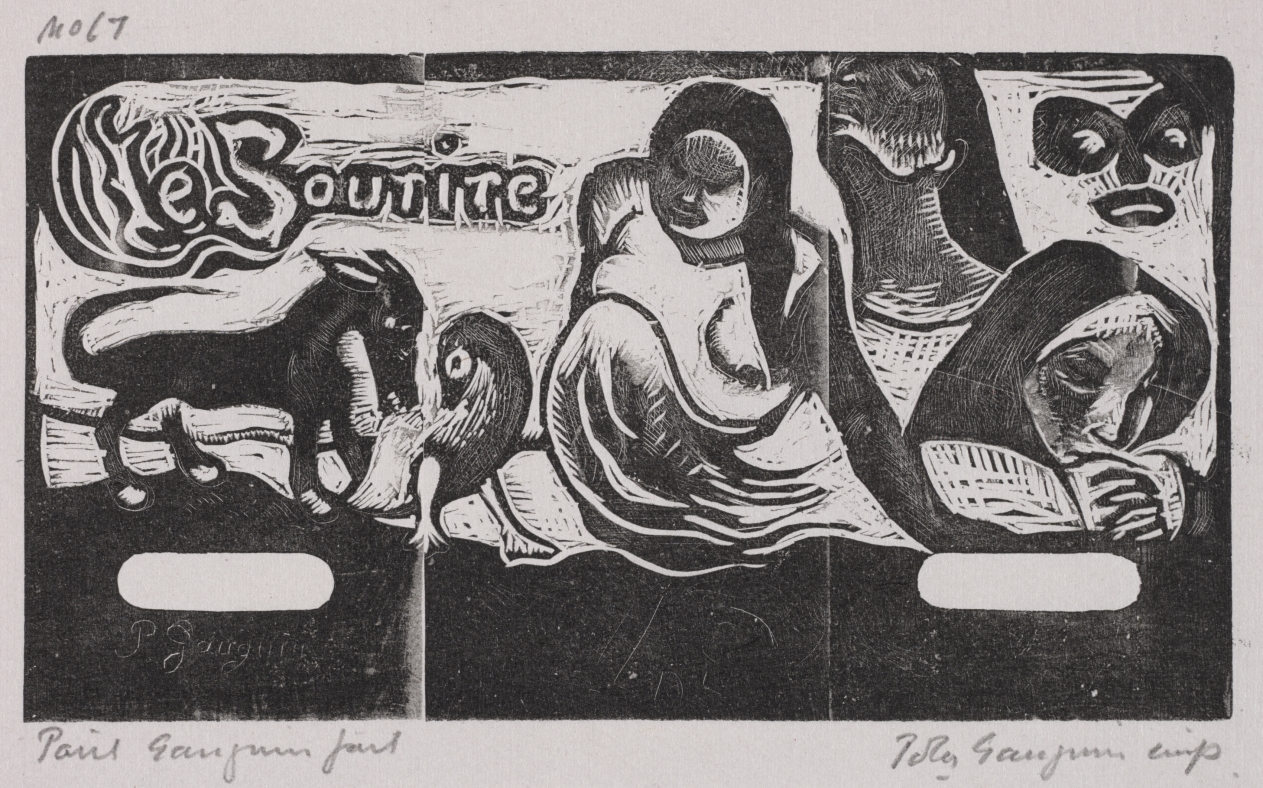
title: Tahitian Series: The Smile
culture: France, 19th century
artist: Paul Gauguin (French, 1848–1903)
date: 1893–94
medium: woodcut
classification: Print